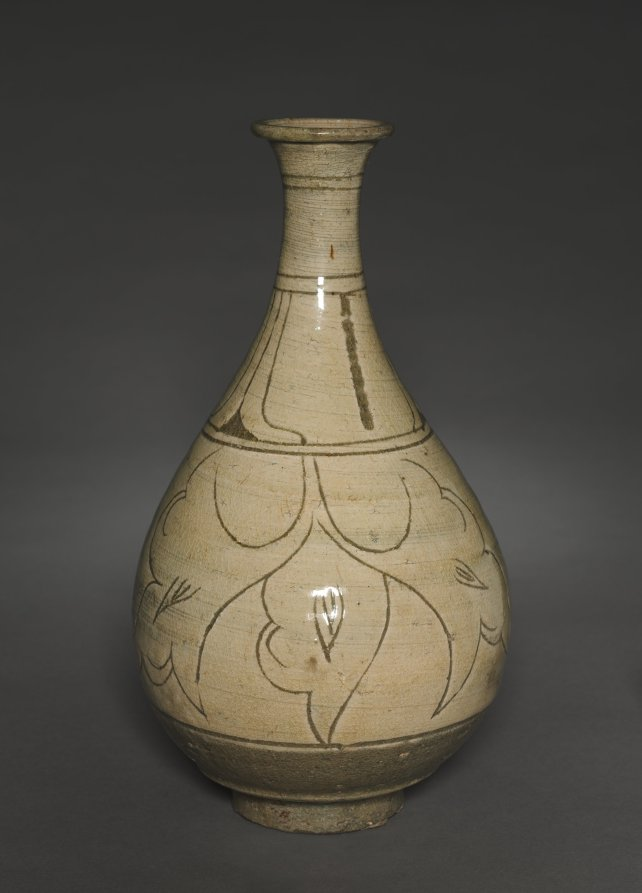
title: Bottle with Incised and Sgraffito Fish Design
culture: Korea, Joseon dynasty (1392–1910)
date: 1400s–1500s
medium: stoneware with incised design (Buncheong ware)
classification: Ceramic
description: This whimsical bottle is classified as Buncheong 분청 (literally, powdered green). Flourishing during the 1400s–1500s, Buncheong indicates pottery with iron-rich clay decorated with white slip. After firing, the color of the clay body usually became greenish-gray due to its high iron content. Korean artists tried to emulate the white porcelain wares of the Chinese Ming period, although the result was not the same. On the surface coated with white slip, the image of a smiling fish is carved in bold lines, a technique distinctive to Jeolla province, a southwest region of the Korean peninsula.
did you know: The fish depicted here seems to be a small yellow croaker, abundant off the southwest coast of the Korean peninsula.